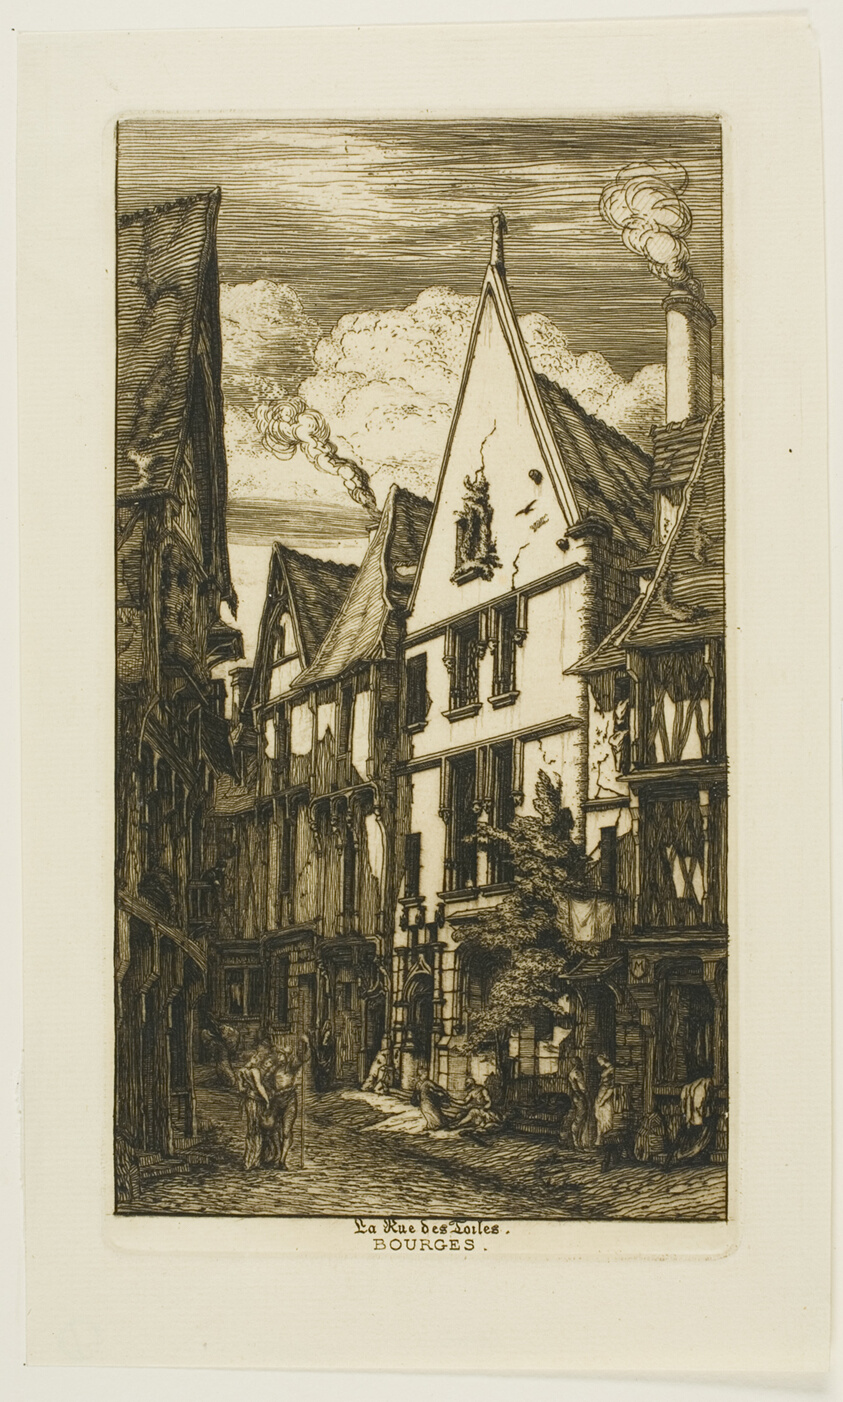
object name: Print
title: Rue des Toiles, Bourges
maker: Charles Meryon (French, 1821-1868)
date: 1853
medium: Etching and drypoint on ivory laid paper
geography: France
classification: etching; print; prints and drawing